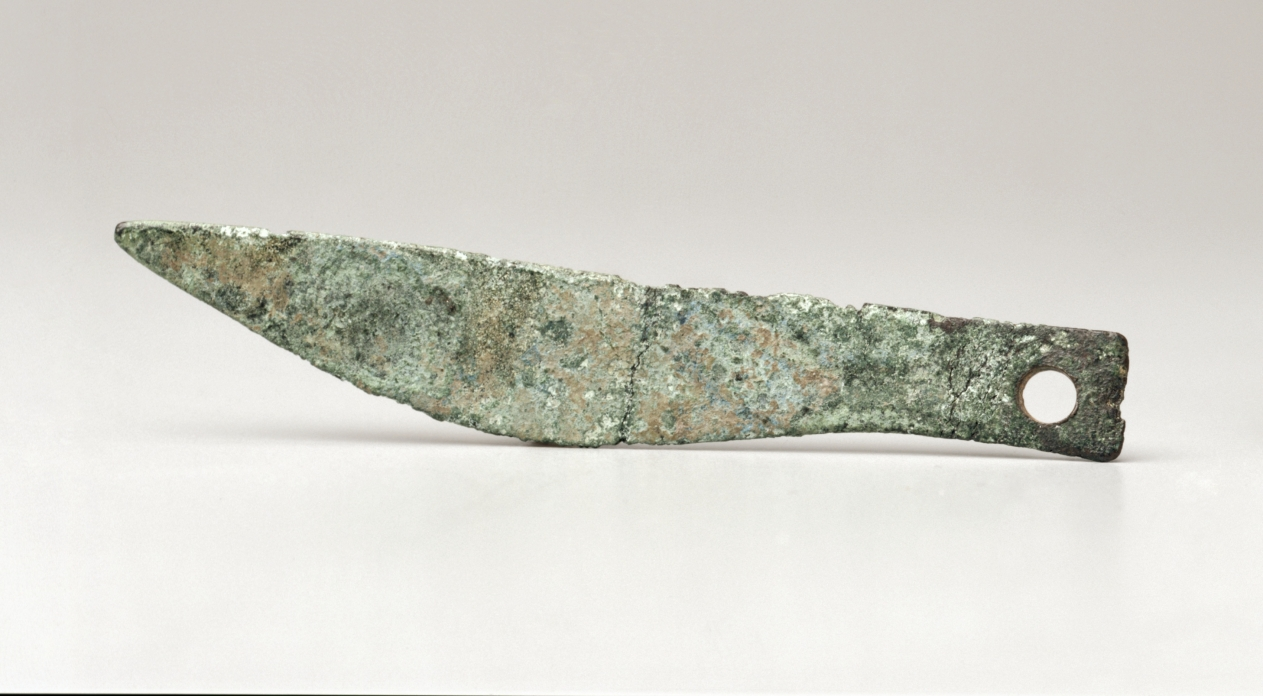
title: Miniature Sword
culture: Etruscan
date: 500–450 BCE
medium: bronze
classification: Sculpture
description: Numerous examples of miniature Etruscan bronze armor and shields are known, often from votive contexts. Perhaps this small sword served such a function.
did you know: This sword was found with the CMA’s Etruscan warrior statuette and—probably wrongly—attached to its left hand.